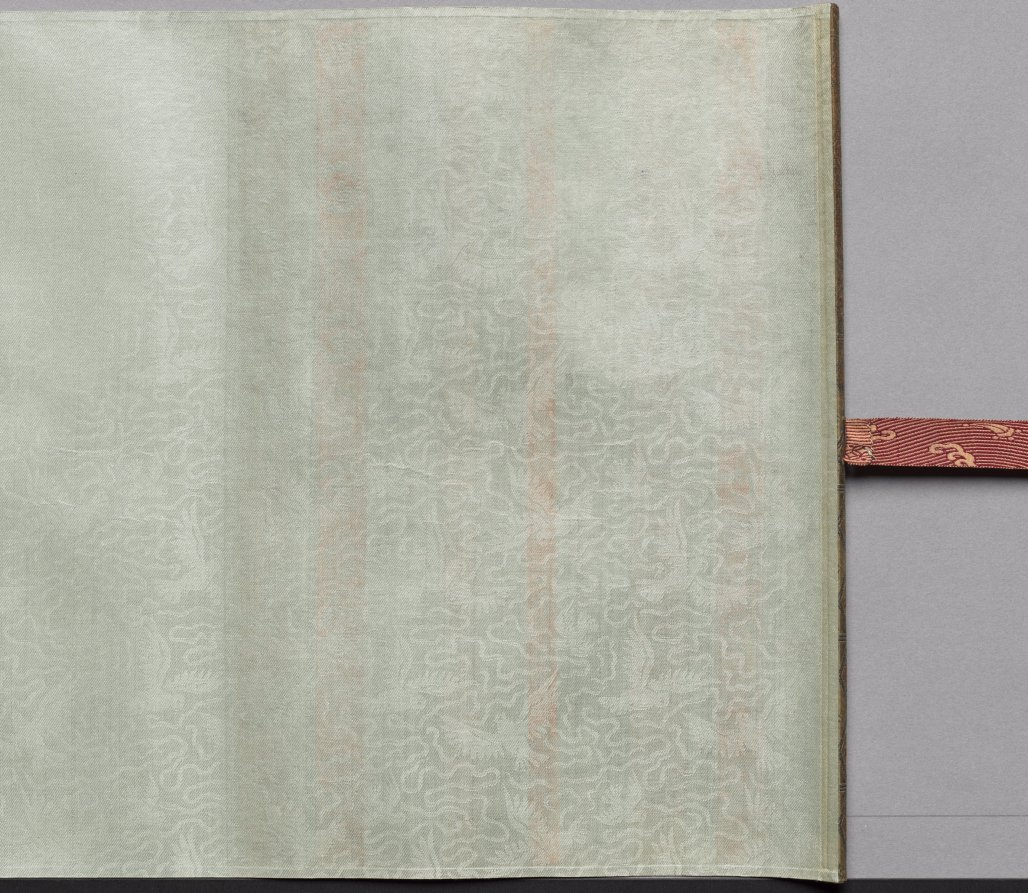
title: A Hundred Sparrows in a Lofty Grove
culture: China, Ming dynasty (1368–1644)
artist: attributed to Lin Liang (Chinese, 1416–1480)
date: 1368–1644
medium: handscroll; ink on silk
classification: Painting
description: Sparrows engaged in all kinds of activities frolic amid leafy branches, blades of grass, rocks, and a waterfall. As our eyes move over the scroll, the artist engages us in enjoying the sparrows’ carefree movements in a natural setting. The charming birds were painted from close observation in swift and fluent brushstrokes. Sparrows are a common bird and in Chinese painting they often represent the commoner in human society as opposed to the noble pheasant or peacock representative of the ruling class.